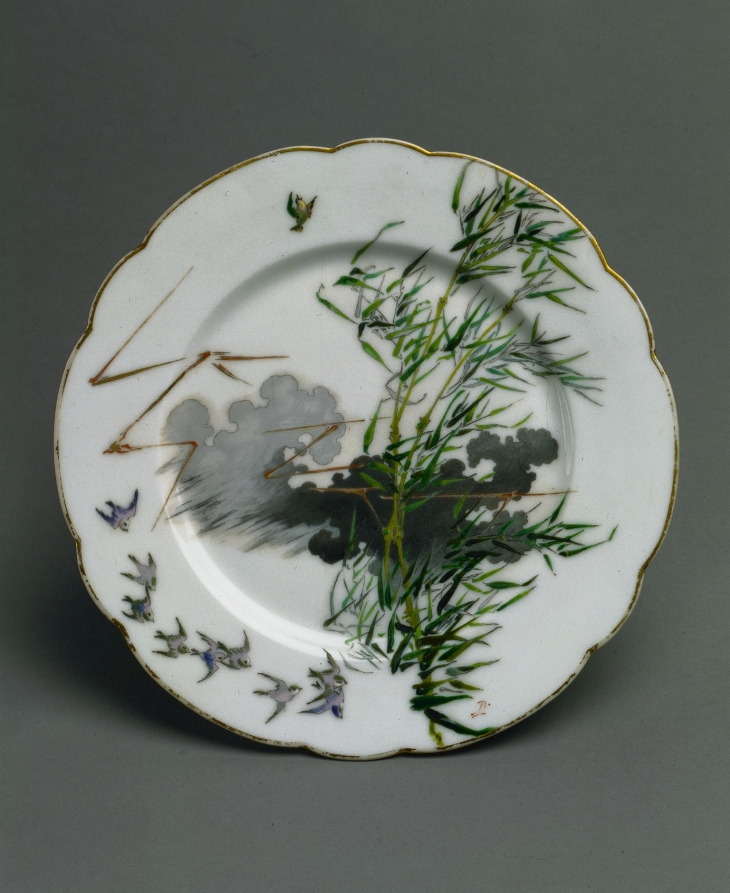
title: Plate: Storm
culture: France, 19th century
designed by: Félix Bracquemond (French, 1833–1914)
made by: Haviland & Co. (French)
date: c. 1876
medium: porcelain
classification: Ceramic